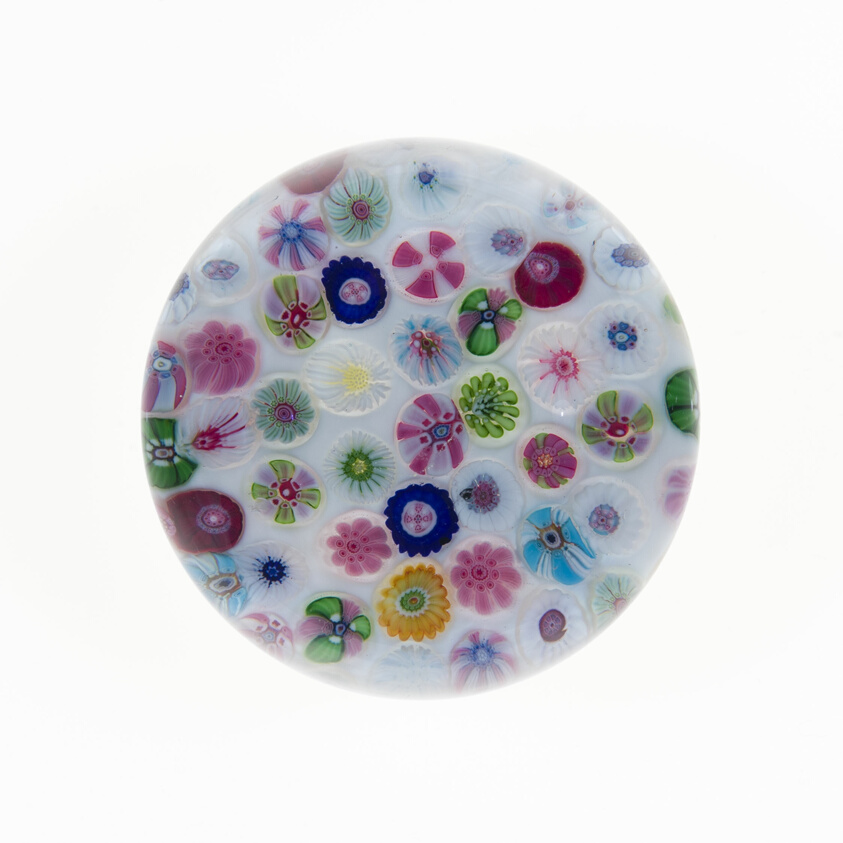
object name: Glass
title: Paperweight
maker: Clichy Glassworks (Cristalleries de Clichy); Clichy, France, 1837-1885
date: 19th century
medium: Glass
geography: Clichy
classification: paperweight; millefiori; european decorative arts; glass